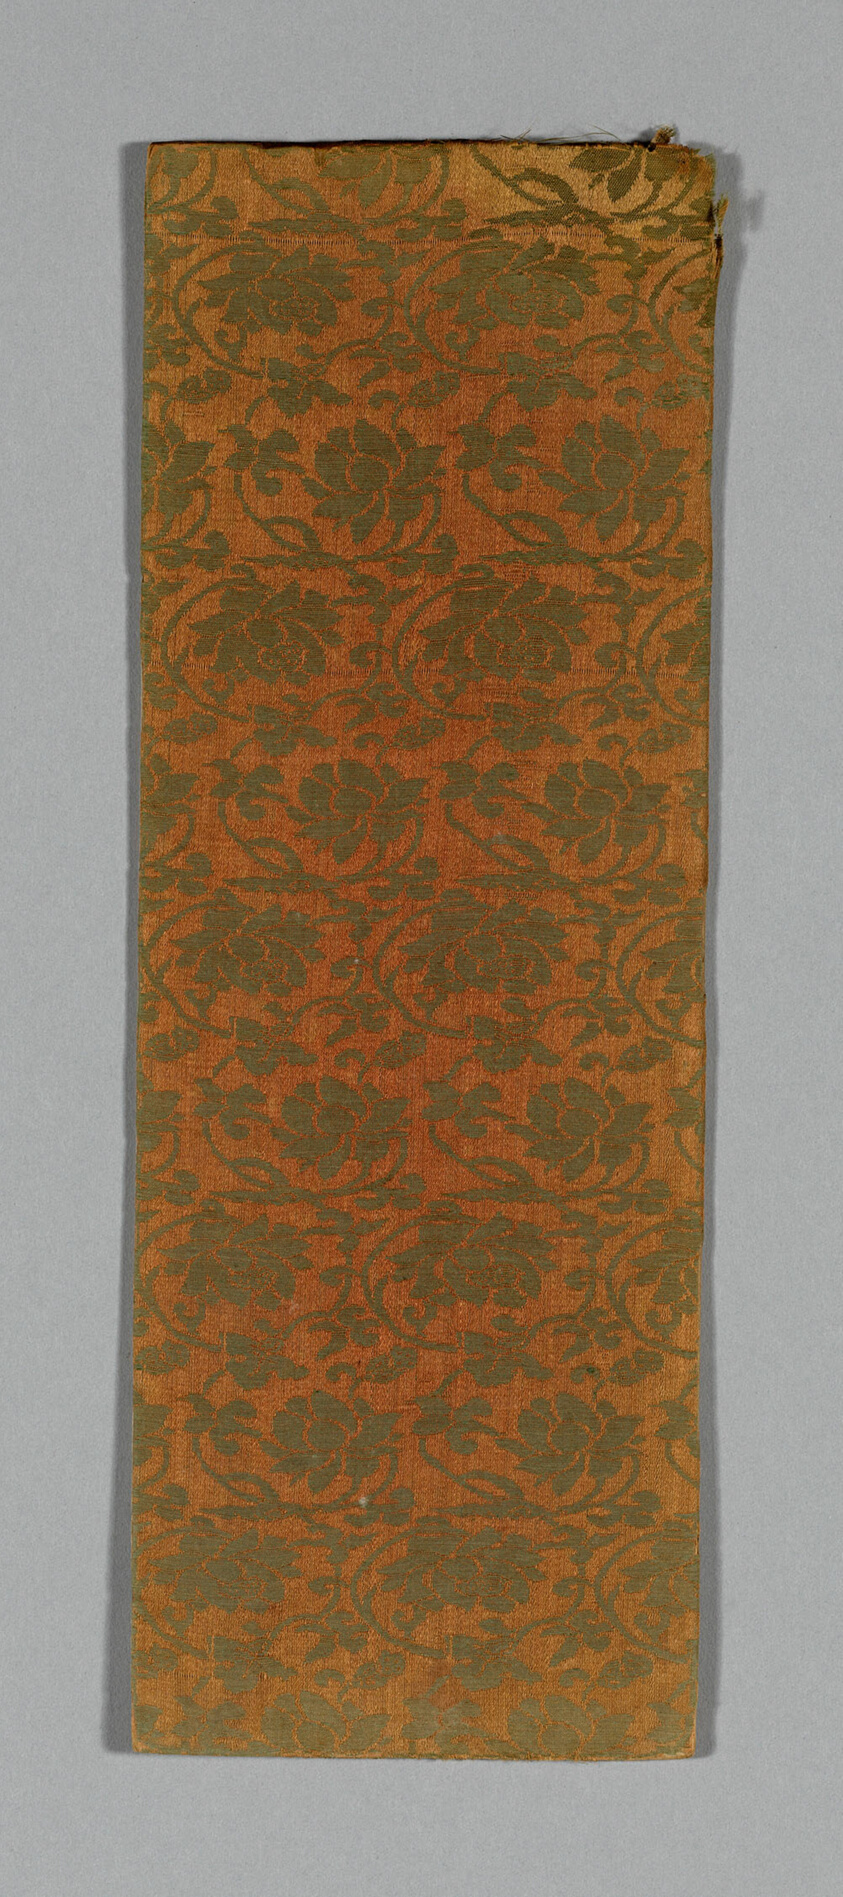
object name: Textile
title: Sutra Cover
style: ming, Chinese (culture or style), East Asian, asian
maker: China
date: Ming dynasty (1368–1644), c. 1590's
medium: Silk 4:1 satin damask weave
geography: China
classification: textile; weaving